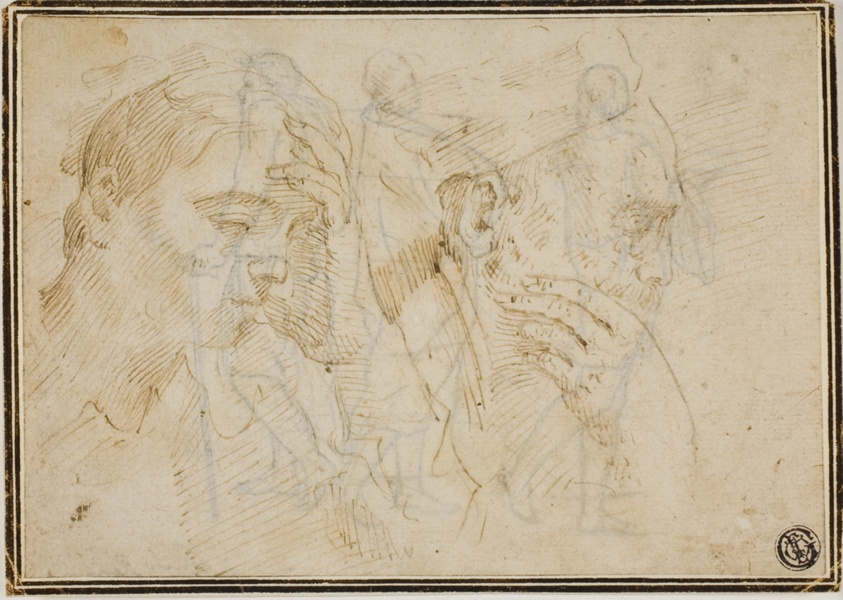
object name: Drawing and Watercolor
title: Sketches of Two Male Heads in Profile to Right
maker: Style of Donato Creti (Italian, 1671-1749); or Guido Reni (Italian, 1575-1642)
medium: Pen and brown ink on cream laid paper, laid down on ivory laid paper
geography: Italy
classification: drawings (visual works); prints and drawing